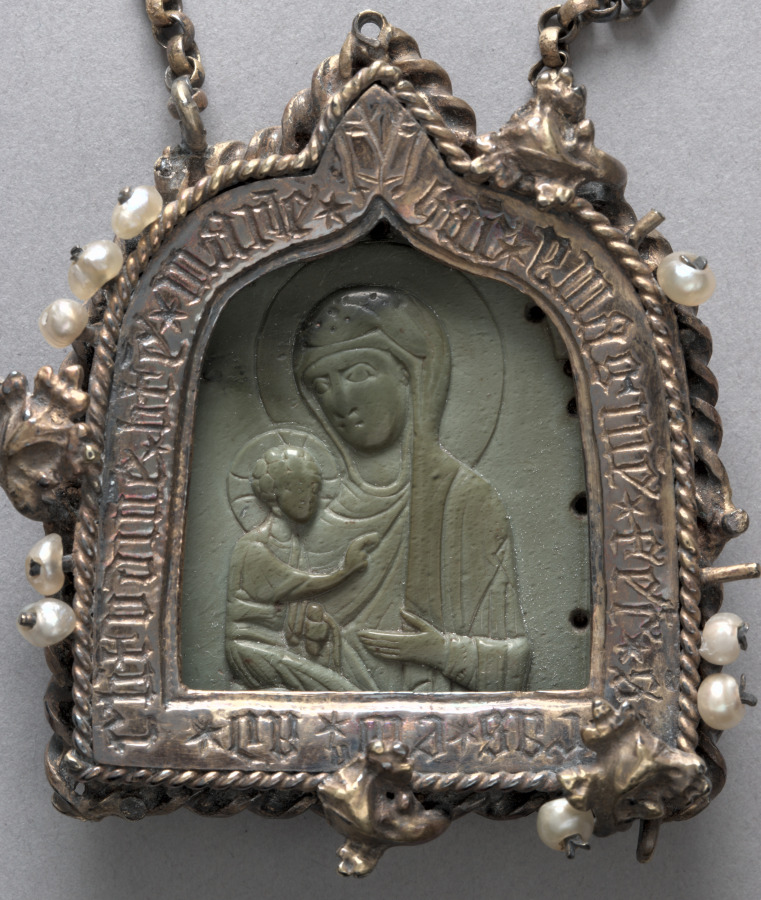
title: Pendant Icon with the Virgin "Dexiokratousa"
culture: Byzantium, Byzantine period, 12th century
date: 1100s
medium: steatite, gilt silver, pearls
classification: Glyptic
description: This small-scale Byzantine icon depicts a half-length figure of the Virgin holding the Christ child. When the icon was mounted in its present frame by a German artist in the 14th century, it was considered to be an authentic portrait painted by Saint Luke. This claim, made in an inscription on the frame, is further emphasized by the ox, Saint Luke’s symbol, engraved on the frame’s reverse.